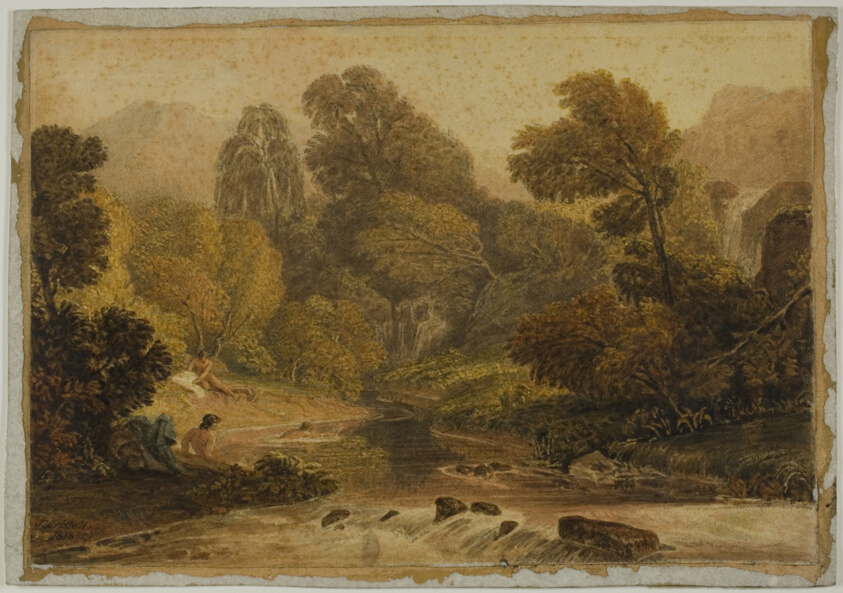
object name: Drawing and Watercolor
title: A Scene Near Lodore, Cumberland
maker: Joshua Cristall (English, c. 1767-1847)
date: 1818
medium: Watercolor over graphite, on ivory wove paper, laid down on board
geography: England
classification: watercolor; drawings (visual works); prints and drawing